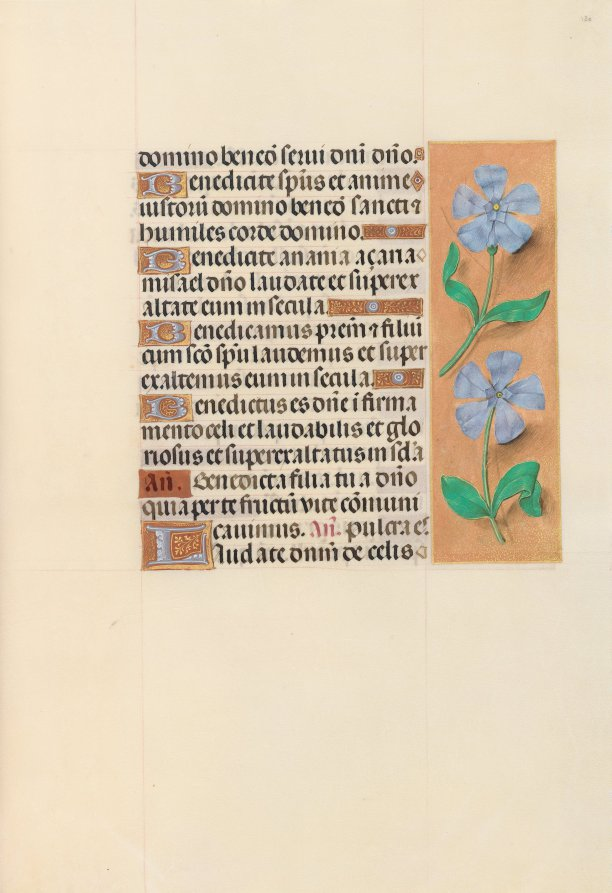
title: Hours of Queen Isabella the Catholic, Queen of Spain: Fol. 120r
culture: Flanders, Ghent and Bruges, late 15th century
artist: Master of the First Prayerbook of Maximillian (Flemish, c. 1444–1519)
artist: and Associates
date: c. 1500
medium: ink, tempera, and gold on vellum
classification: Bound Volume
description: This manuscript was illuminated by a circle of at least five highly organized manuscript painters active in the Flemish cities of Ghent and Bruges. The principal illuminator was Alexander Bening, who painted the majority of the book's miniatures. Manuscripts produced by this circle of artists are renowned for the decoration of their borders, which typically feature a rich variety of realistically-painted flowers, birds, and butterflies. This prayer book, called a book of hours, was intended not for a cleric, but for the private devotions of a lay person-in this case, Isabella the Catholic, Queen of Spain (1451-1504). Isabella's coat of arms embellishes the book's frontispiece. It is unlikely that the book was commissioned by the Queen herself; rather, she probably received it as a diplomatic gift from someone courting her patronage, perhaps Cardinal Francisco Jimenez de Cisneros. A Franciscan friar, Jimenez was dependent upon Isabella for his advancement, first to the post of Queen's confessor in 1492, and then to Archbishop of Toledo in 1495.